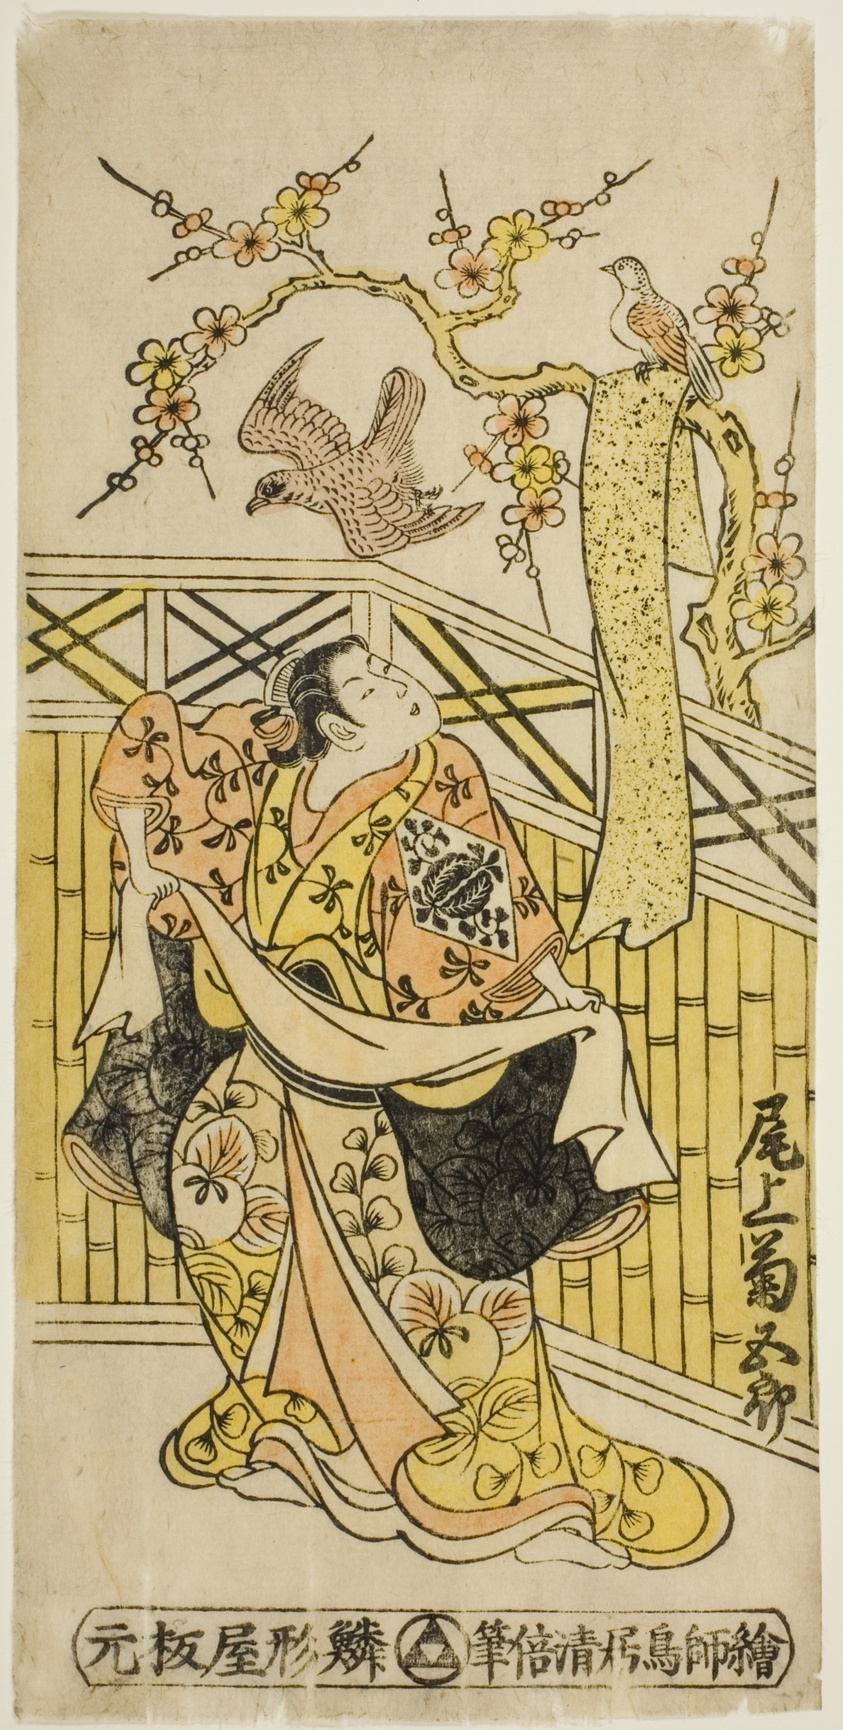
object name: Print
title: The Actor Onoe Kikugoro I as Tokiwa in the play "Tonozukuri Genji Junidan," performed at the Ichimura Theater in the eleventh month, 1744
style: Japanese (culture or style)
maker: Torii Kiyomasu II (Japanese, 1706 (?)–1763 (?))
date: 1744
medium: Hand-colored woodblock print; hosoban, urushi-e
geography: Japan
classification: woodblock print; print; asian art